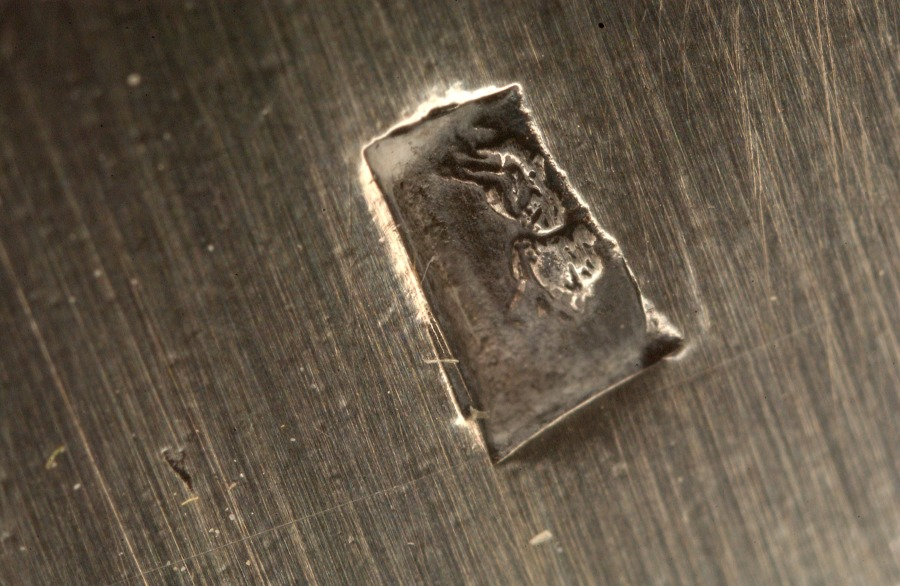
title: Covered Tureen on Stand (Pot à oille)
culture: France, late 18th-early 19th Century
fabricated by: Henry Auguste (French, 1759–1816)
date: 1797–98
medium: silver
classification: Silver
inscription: [Coat-of-arms of Amoral don Federico Carlos Gravina on bowl; cover; stand]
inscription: [Assay mark for large-sized work, 1798-1809, lining exterior; tureen foot exterior]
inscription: [Assay mark for medium-sized work, 1798-1809, beneath stand foot; on edge of cover]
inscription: [Maker's mark of Henri Auguste, master silversmith in 1785, beneath tureen foot; beneath stand foot; inside stand foot edge]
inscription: [Official assay mark for first standard silver, Paris, 1798-1809, beneath stand foot; lining exterior; on cover]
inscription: [Official mark for silver imported from countries with customs conventions, 1838-1912, beneath stand foot; edge of cover; tureen lip exterior; lining exterior; on one tureen handle; outside stand foot; tureen foot exterior]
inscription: [Unknown mark, possibly Ceres' profile in square with "E" and "7", beneath stand foot; on cover; rim of lining; tureen foot exterior; tureen lip exterior]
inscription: [Unofficial assay mark for first standard silver, Paris, 1794-1797, beneath foot stand; beneath tureen foot; near tureen handle exterior]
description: This pot-à-oille was designed by master goldsmith Henri Auguste after drawings by draftsman and sculptor Jean Guillaume Moitte. Though many of the neoclassical decorative elements on this piece are pulled from Moitte’s design, Auguste’s final product leaves out much of the proposed ornamentation. Instead this object finds distinction in its large size and smooth expanses of silver that emphasize the purity of its lines.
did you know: The coat of arms on the body of the work corresponds to the family of Federico Carlos Gravina, a Sicilian-Spanish admiral who was known to have had a close diplomatic relationship with Napoleon I.